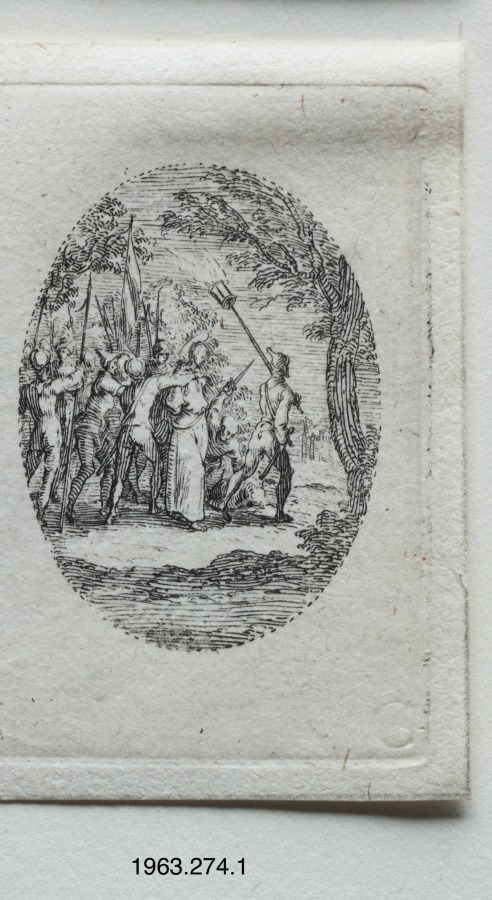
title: The Mysteries of the Passion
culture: France, 17th century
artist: Jacques Callot (French, 1592–1635)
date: 1631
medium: etching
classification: Print